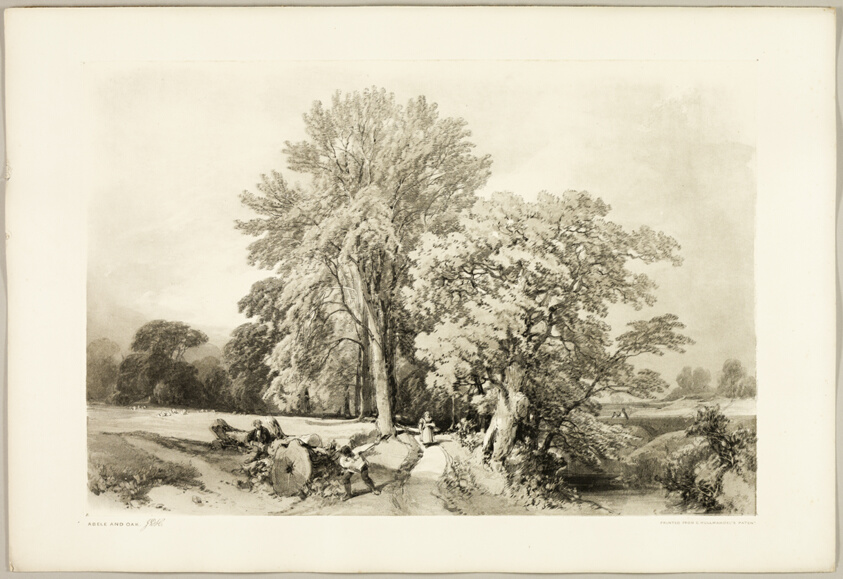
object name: Print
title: Abele and Oak, from The Park and the Forest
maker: James Duffield Harding (English, 1798-1863); printed by Charles Joseph Hullmandel (English, 1789–1850); published by Thomas McLean (English, 1788–1875)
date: 1841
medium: Lithograph in black, with gray tint from a second plate, on ivory wove paper, laid down on ivory wove paper (chine collé)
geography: England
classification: lithograph; print; prints and drawing